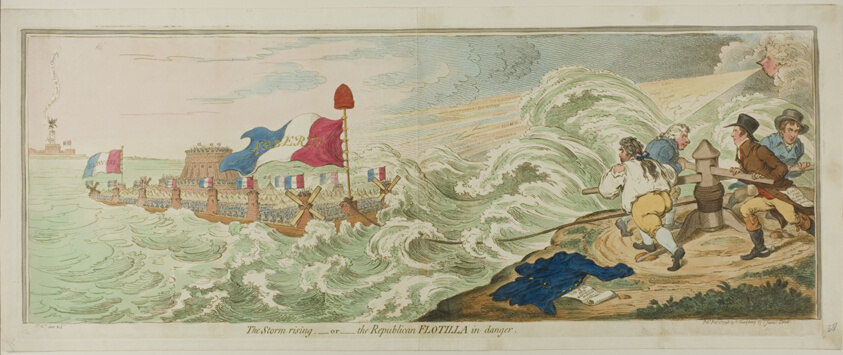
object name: Print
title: The Storm Rising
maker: James Gillray (English, 1756-1815); published by Hannah Humphrey (English, c. 1745-1818)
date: publilshed February 1, 1798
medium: Hand-colored etching on paper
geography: England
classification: etching; print; prints and drawing